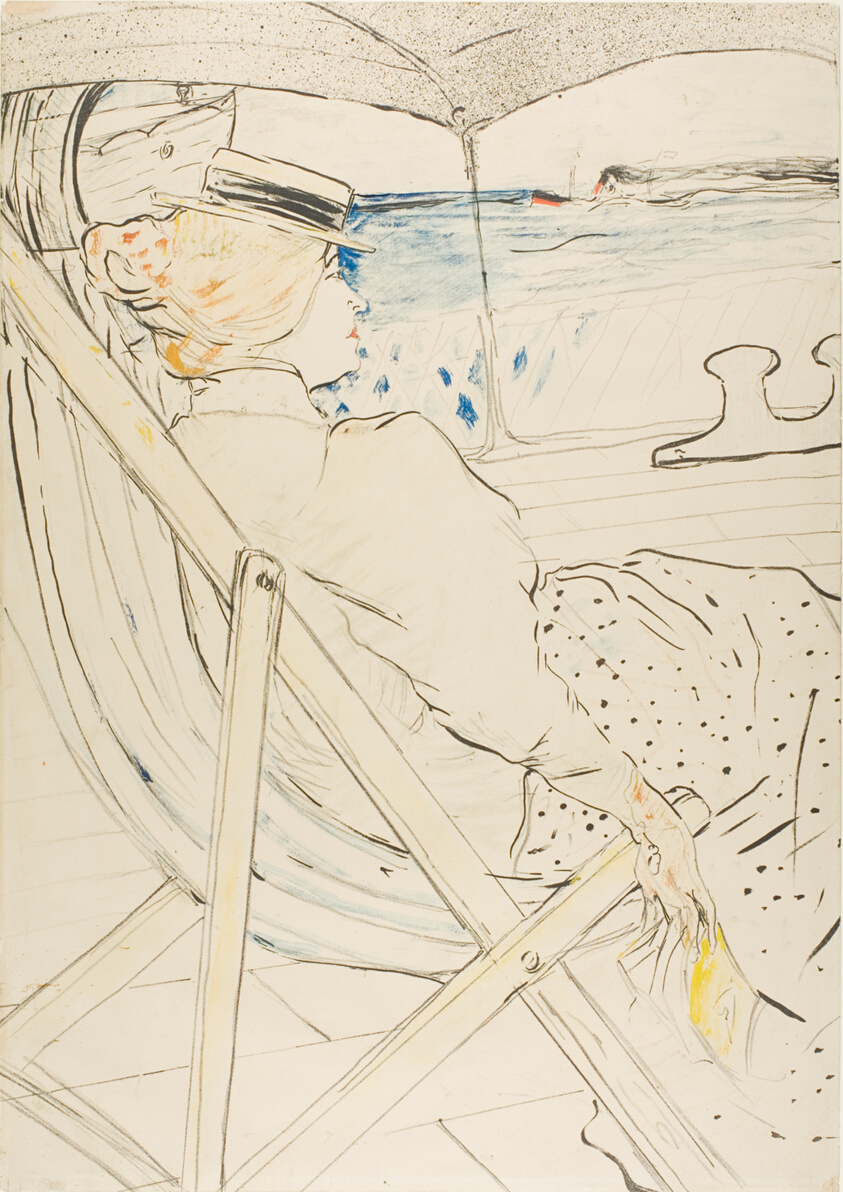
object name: Print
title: The Passenger in Cabin 54—The Cruise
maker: Henri de Toulouse-Lautrec (French, 1864-1901)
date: 1896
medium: Color lithograph on ivory wove paper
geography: France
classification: lithograph; print; prints and drawing